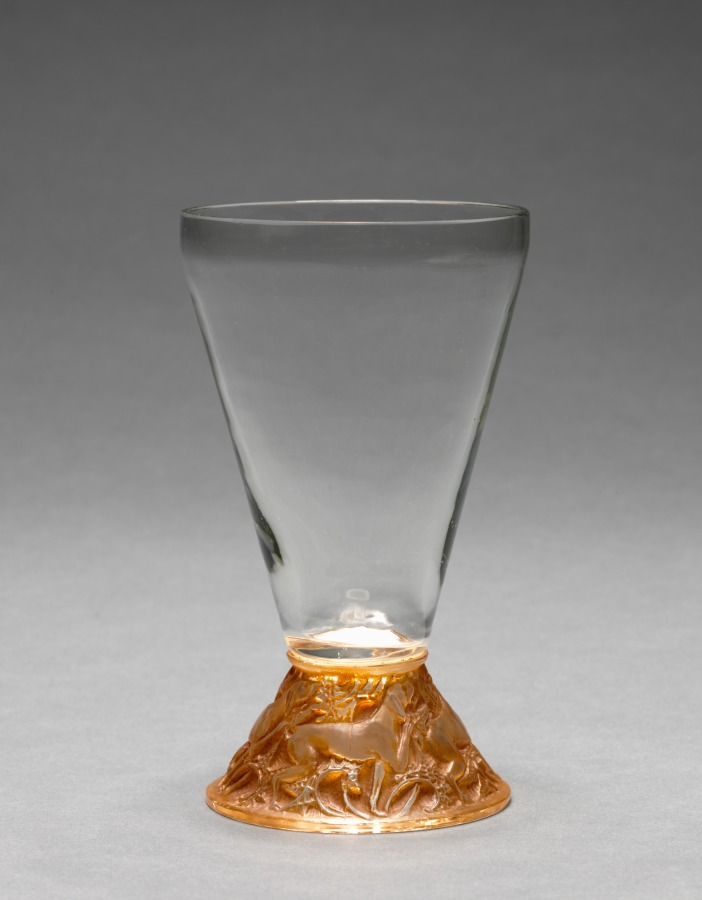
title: Hunting Dogs Footed Red Wine Glass (Verre à pied, chasse chiens)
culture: France, 20th century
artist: René Lalique (French, 1860–1945)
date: c. 1913–21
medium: glass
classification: Glass